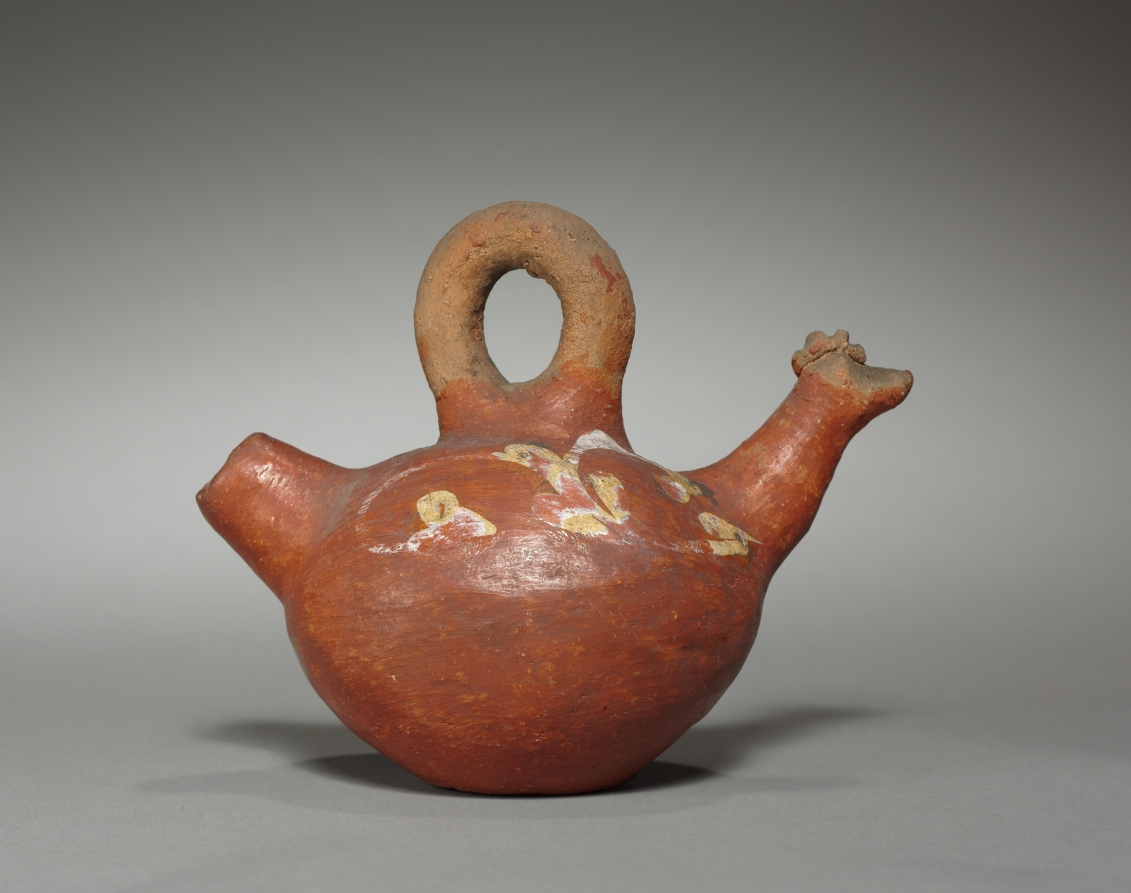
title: Bottle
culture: Peru, 20th century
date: 1900–1920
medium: pottery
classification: Ceramic